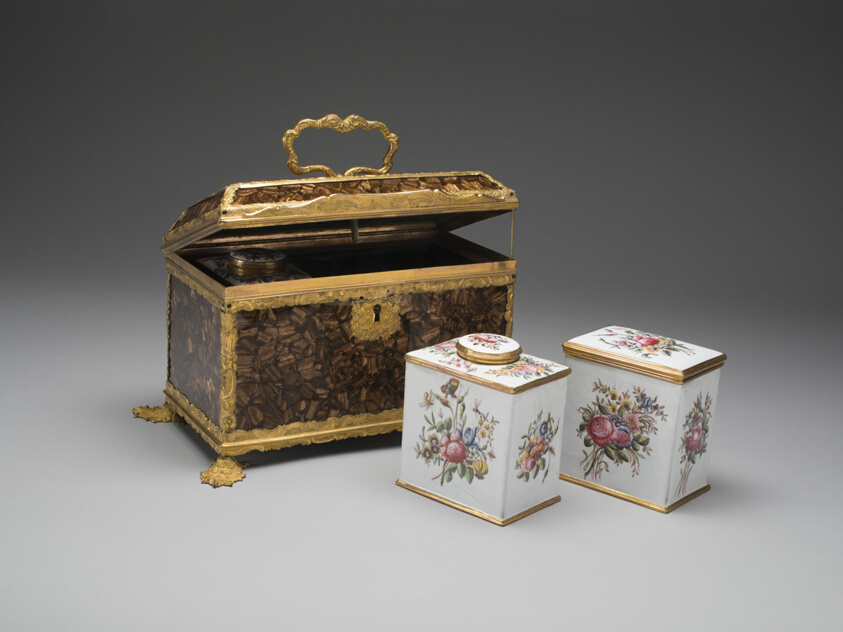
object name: Metalwork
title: Casket Containing a Sugar Box and two Tea Caddies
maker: Birmingham, England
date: c. 1760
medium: Glass, metal mounts, enameled copper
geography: Birmingham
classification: glass; enamel; sugar bowl; teaware; metal; ceramics; metalwork